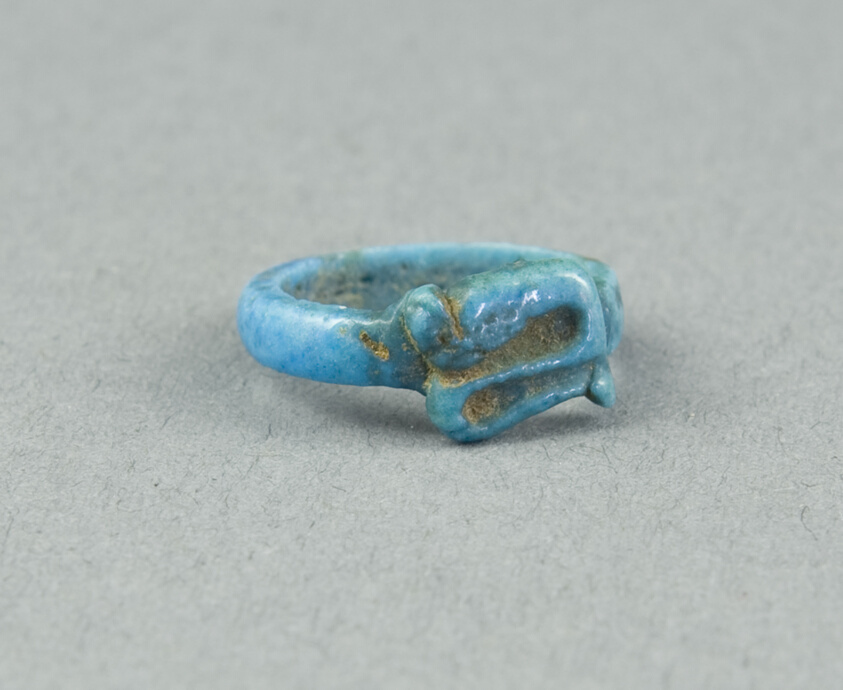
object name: Costume and Accessories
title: Ring: Figure of Serpent Uto (?)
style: egyptian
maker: Egyptian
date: New Kingdom, Dynasty 18 (about 1390 BCE)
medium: Faience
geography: Egypt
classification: ring (jewelry); ceramics; jewelry; ancient art; costume; faïence (composite material)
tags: goddesses